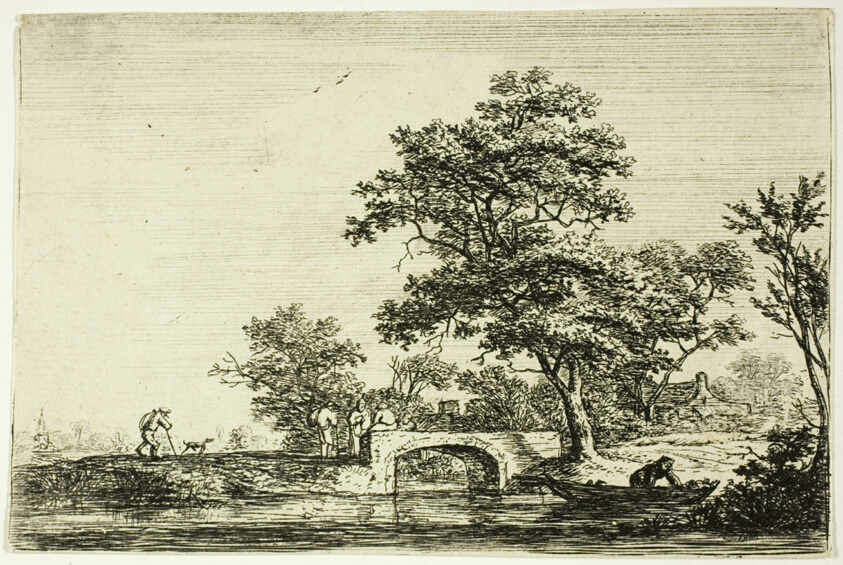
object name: Print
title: Four Men on a Stone Bridge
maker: Anthonie Waterloo (Dutch, c. 1610-1690)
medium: Etching on paper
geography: Holland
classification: etching; print; prints and drawing